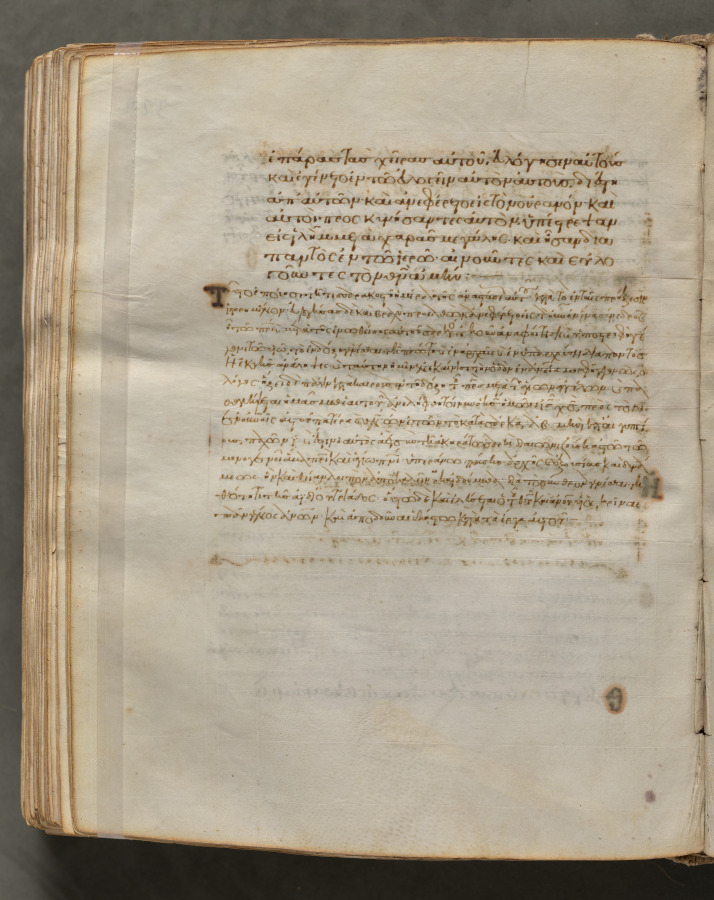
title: Text, folio 322 (verso), from a Gospel Book with Commentaries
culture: Byzantium, Constantinople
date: c. 1000–1100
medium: ink, tempera, and gold on vellum; leather binding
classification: Bound Volume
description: Each of the four gospels in this book opens on a page with brilliantly illuminated borders depicting the author of the text as well as birds—principally peacocks, symbols of the immortality of the soul—and fountains, representing the fountain of life and the salvation of the soul. This volume consists of 428 leaves with texts in Greek. Its level of sophistication suggests that it was probably written and decorated in a monastery in Constantinople.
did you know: Gospel books were carried in procession through Byzantine churches.